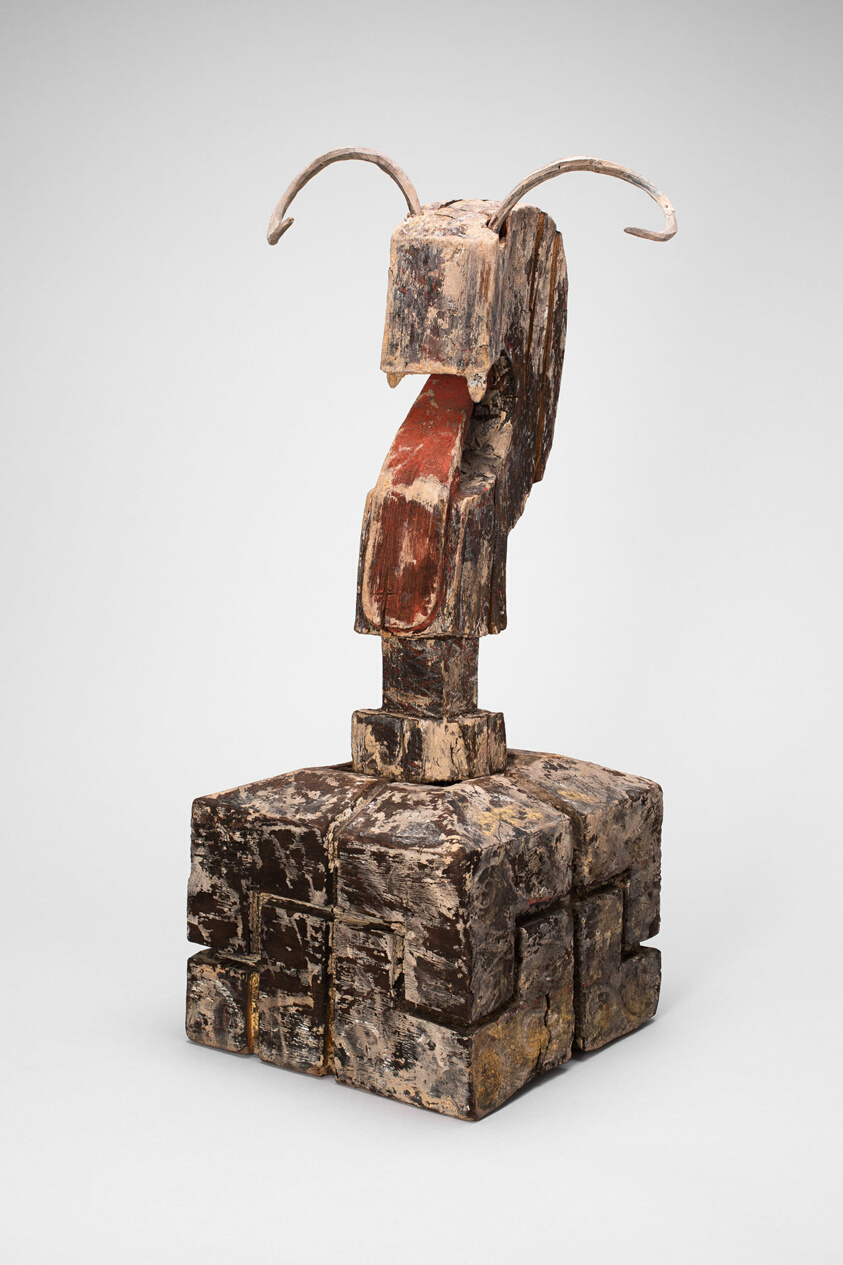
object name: Sculpture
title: Grave Guardian Beast (Zhenmu Shou)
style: Chinese (culture or style)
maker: China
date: Warring States period (480–221 BCE), 4th or 3rd century BCE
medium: Wood with polychrome pigments and lacquer horns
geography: China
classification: wood; sculpture; asian art